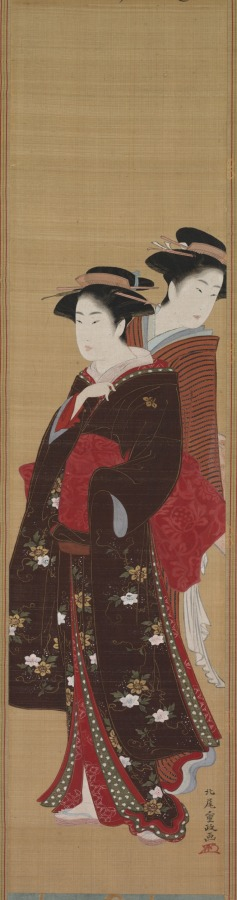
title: Two Beauties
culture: Japan, Edo period (1615–1868)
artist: Kitao Shigemasa (Japanese, 1739–1819)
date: late 1700s–early 1800s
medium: hanging scroll, pillar painting: ink and color on silk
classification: Painting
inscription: Artist's signature and seal, lower right corner. Poem inscribed on upper section of scroll.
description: Shigemasa favored using colors in broad opaque masses, as seen here in the beauties’ robes. He was a painter, printmaker, and poet, specializing in courtesan and actor prints. The format of this hanging scroll or "pillar painting" allows for the work to be hung on a pillar in a Japanese home.